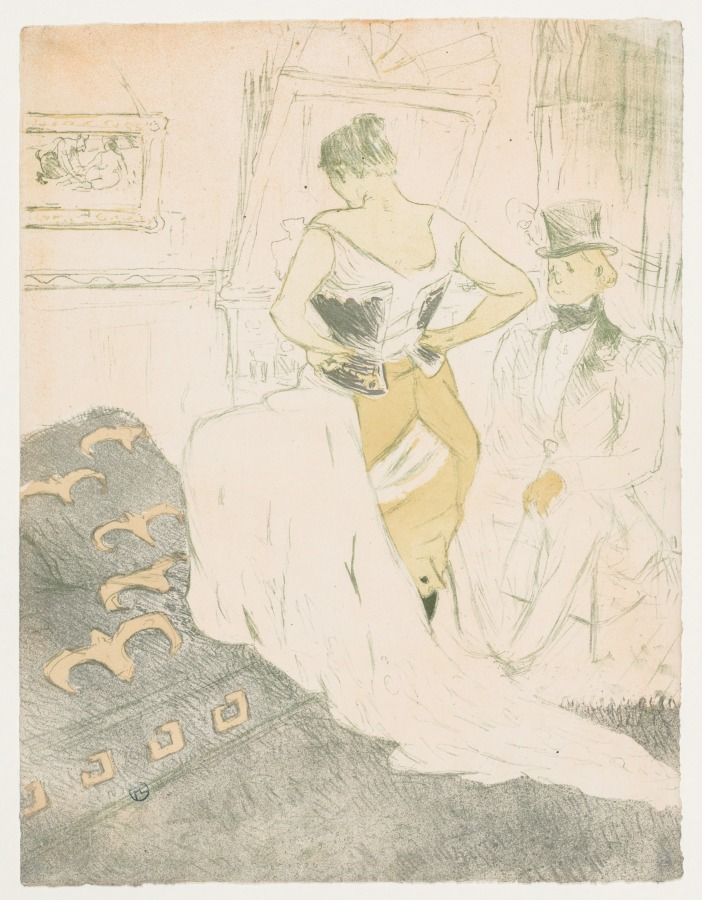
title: Elles: Woman In a Corset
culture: France, 19th century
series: Elles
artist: Henri de Toulouse-Lautrec (French, 1864–1901)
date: 1896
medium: color lithograph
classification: Print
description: Like Cassatt, Toulouse-Lautrec also made a series of color prints depicting the daily lives of women, but instead of portraying bourgeois wives and mothers, his subjects were prostitutes. His series of twelve lithographs entitled Elles boldly confronted the reality of late 19th-century Parisian brothels on the rue de Moulins and the rue de Richelieu, in which rich men's pursuit of pleasure with the daughters of the poor was legal and accepted. Although not portraits of classic beauty, his depictions of Parisian prostitutes embrace the poignancy of human experience. Here, a prostitute unhooks her corset in the presence of a client, her face sympathetically averted from the viewer's gaze.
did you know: This print belongs to a portfolio published by the dealer Gustave Pellet, who created a special luxury paper that featured a watermark of his initials.